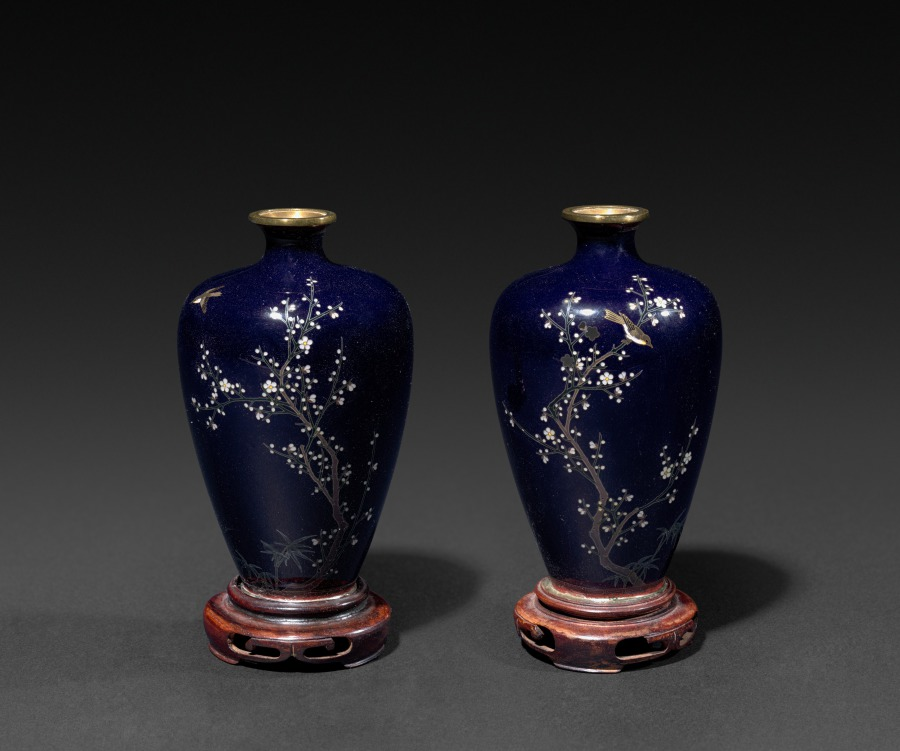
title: Pair of Vases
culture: Japan, Meiji period (1868–1912) or Taishō period (1912–26)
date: early 1900s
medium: cloisonne enamel with wood bases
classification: Enamel